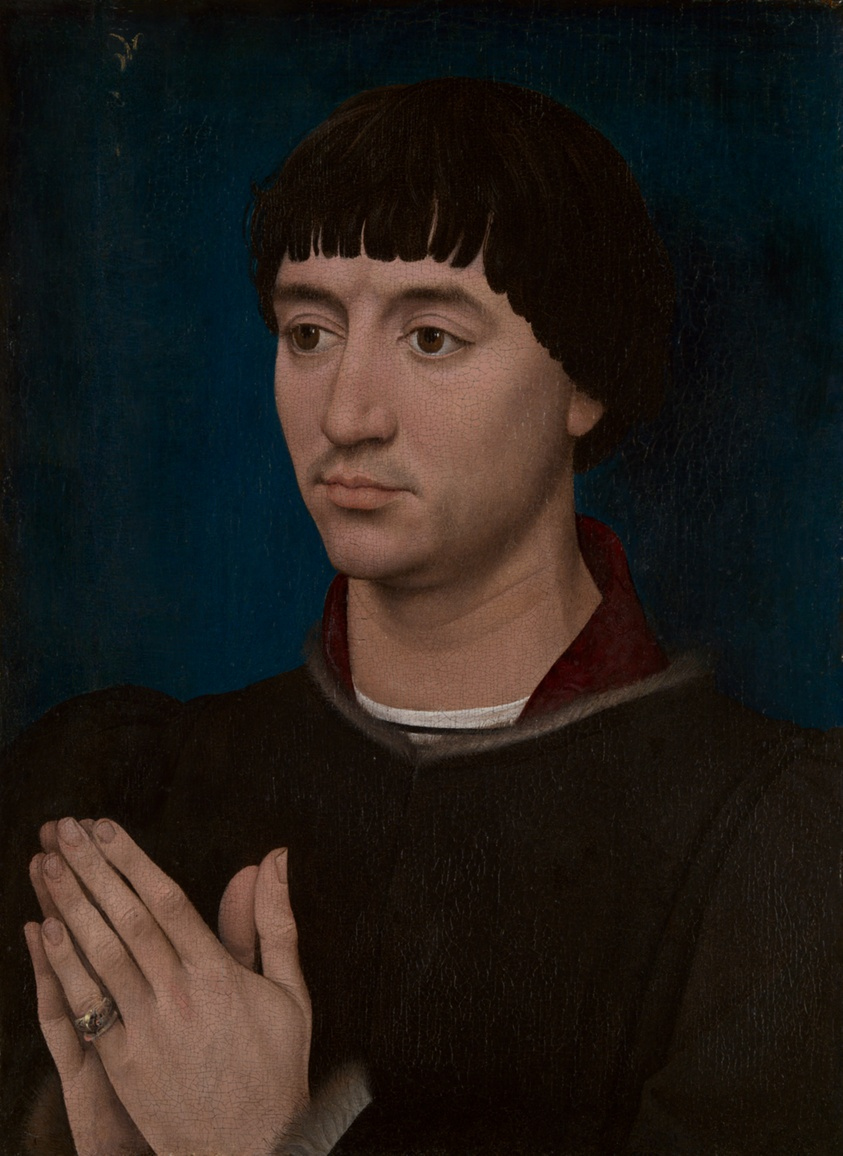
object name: Painting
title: Portrait of Jean Gros (recto); Coat of Arms of Jean Gros (verso)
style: Renaissance, 15th century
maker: Rogier van der Weyden (Netherlandish, c. 1399–1464); Workshop of Rogier van der Weyden (Netherlandish, c. 1399–1464)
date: 1460–64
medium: Oil on panel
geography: Flanders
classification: oil on panel; paint; oil paintings (visual works); painting; european painting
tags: portraits: male subject, portrait, prayer, jewelry, man, coat of arms, tower, shields, tassels, blue, blue (color), gold (color), portraits, Century of Progress, world's fairs, Chicago World's Fairs